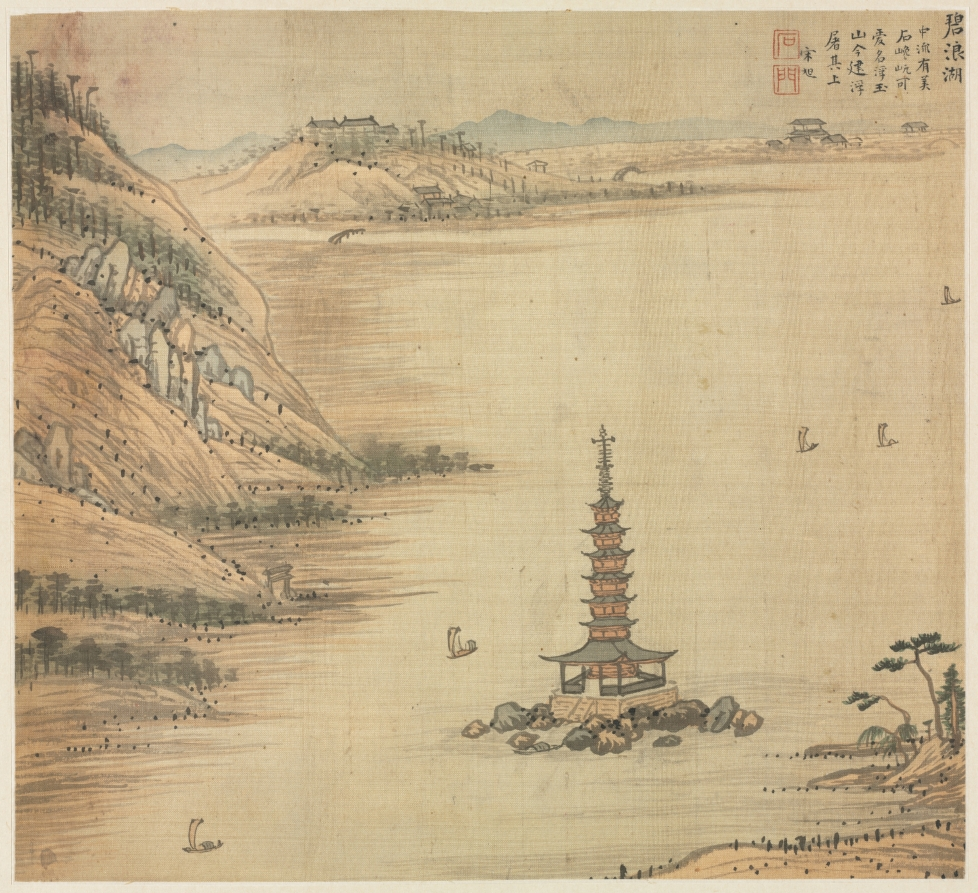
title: Bilang Lake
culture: China, Jiaxing, Ming dynasty (1368–1644)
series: Eighteen Views of Huzhou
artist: Song Xu (Chinese, 1525-c. 1606)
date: c. 1588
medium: Album leaf; ink and color on silk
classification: Painting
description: By the 1500s, visits to historic and scenic sites in the lower Yangzi delta stimulated an increase of printed illustrated travel books. Topographical depictions of local scenery flourished. Leaves from this album illustrates sites around Lake Tai of the two adjacent counties Changxing and Wuxing (modern Huzhou). Song Xu, who lived intermittently in Jiaxing and Songjiang, must have passed through Wuxing by boat and thus knew the region. The paintings are inscribed with gazetteerlike notations, suggesting that the album was produced for clients as commemorative works, a travel guide, or for “armchair travel” (woyou) in one’s mind.